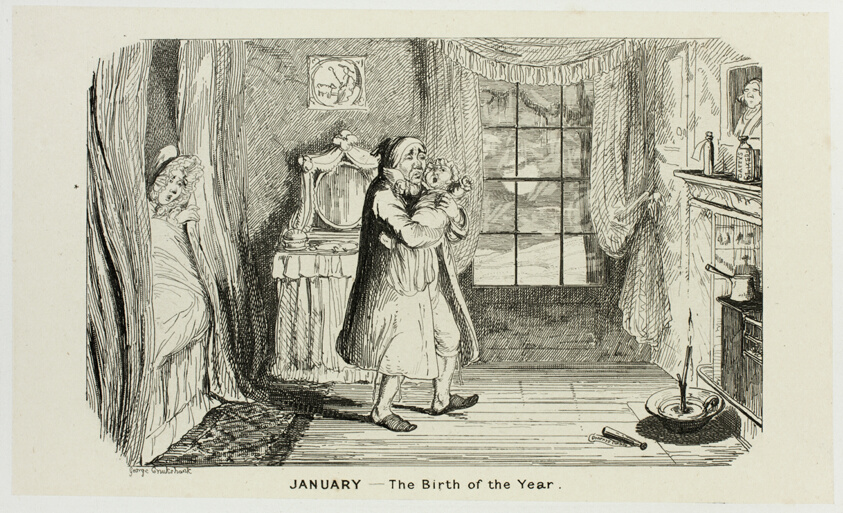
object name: Print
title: January - The Birth of the Year from George Cruikshank's Steel Etchings to The Comic Almanacks: 1835-1853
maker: George Cruikshank (English, 1792-1878); published by Pickering & Chatto (English, 19th century)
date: 1839, printed c. 1880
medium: Steel etching in black on cream India paper, laid down on off-white card (chine collé)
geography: England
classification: etching; paper; steel; print; prints and drawing